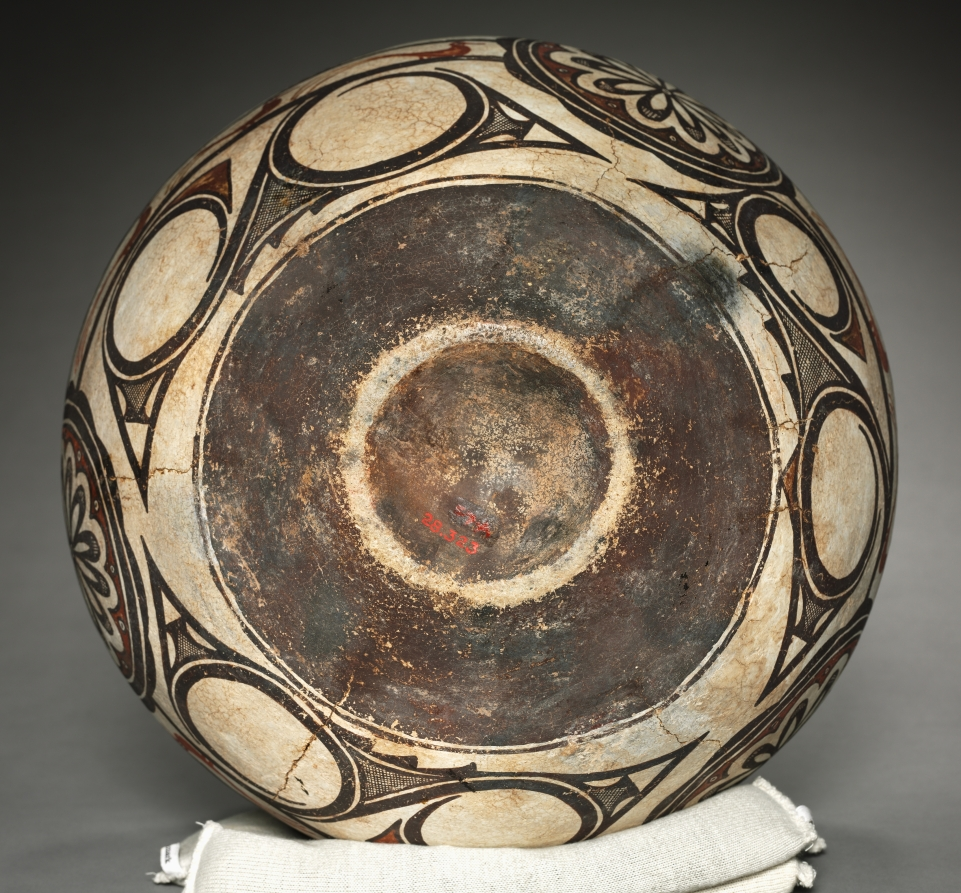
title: Water Jar (Olla) with Rosettes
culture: Native North America, Southwest, New Mexico, Zuni (A:shiwi) Pueblo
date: 1880s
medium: ceramic, slip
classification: Ceramic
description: In the past, motifs painted on Zuni (A:shiwi) ceramics likely held symbolic meanings but, if so, they are largely lost to memory—or at least the Zuni do not discuss them today. Where known, they seem to concern water, verdant crops, and abundant wildlife, also the focus of much Pueblo religious life. For instance, the large, triangular, blade-like forms around this vessel’s neck may represent the thunder knife used in many ceremonies. The petaled forms in circular rosettes refer to sunflowers.